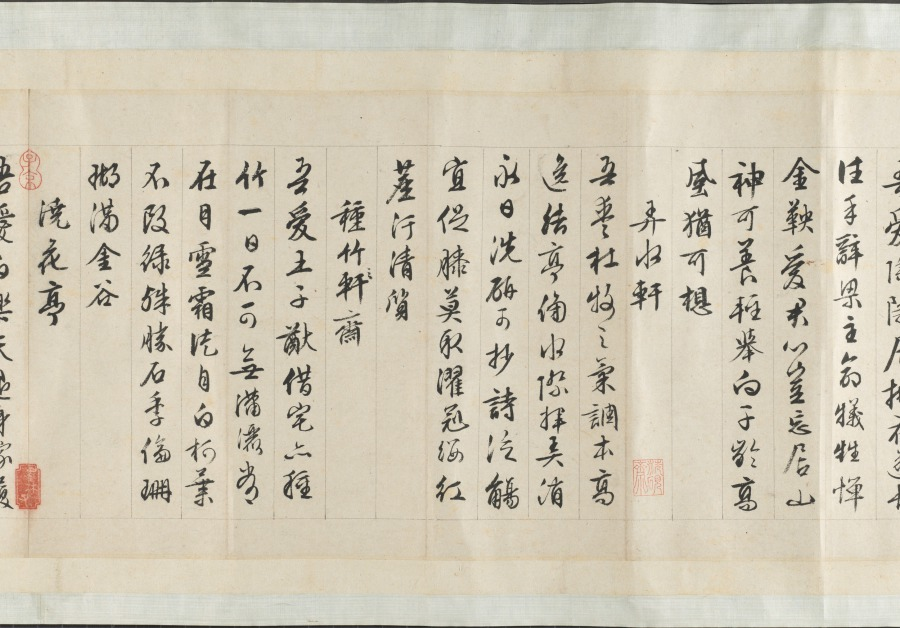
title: Garden for Solitary Enjoyment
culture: China, Ming dynasty (1368–1644)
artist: Qiu Ying (Chinese, 1494–1552)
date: 1515–52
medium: Handscroll; ink and light color on silk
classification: Painting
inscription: Accompanying text of an essay together with seven poems of Sima Guang (1019–1086) and one poem of Su Shi (1037–1101) written by Wen Zhengming (1470–1559) in 1558.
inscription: 2 colophons and 82 seals: 4 seals of Wen Zhengming 文徵明 (1470–1559); 59 seals of Xiang Yuanbian 項元汴 (1525–1590); 1 colophon, dated 1644, and 7 seals of Xiang Yukui 項禹揆 (c. late 1500s–1659); 1 colophon, dated 1880, and 2 seals of Weng Tonghe 翁同龢 (1830–1904); 2 seals of Ch'eng Chen-i (19th c.); 1 seal of Han Ch'ung (19th c.); 4 seals of Wan-go H. C. Weng 翁萬戈 (1918–2020); 3 seals unidentified.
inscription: Colophon by Xiang Yukui 項禹揆 (c. late 1500s–1659): The painting of The Garden for Self-enjoyment on the right by Shih-chou, Mr. Qiu [Qiu Ying] is in the style of Li Lung-mien. Its mood is peaceful, as if meeting the ancient gentlemen face to face among the brushes and silk; it lifts one above the sordid bustle of life. Formerly, my late father handed me this scroll which had only the painting without the written essay. I considered asking a good calligrapher to write the essay to add to it but was afraid that the quality of the writing would not match the painting. Several years later, I saw at a friend's house this essay and poems (of Ssu-ma Kuang] written by Hengshan [Wen Zhengming], once owned by my grandfather; so I spared no expense to obtain it. I rejoiced at this and said: "The divine swords are finally united. How things are pre-destined!" Now my friend Chang Kung-chao's technique for mounting [painting and calligraphy] is excellent. Therefore by daring to take them out and join them together, I can preserve this beautiful story of singular reunion. Xiang Yukui recorded at Hai-yeh-t'ang [hall] two days before New Year's Eve in the jiasheng year of the Chongzhen era [1644]. trans. LYSL/HK/WKH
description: Garden of Solitary Enjoyment refers to a site built in 1073 by the statesman Sima Guang (1019–1086) after he had retired to Luoyang, Henan province. Every spring, visitors would flock to his garden. Each of its seven structures references a historic figure. Sima wrote: I channel streams [like Du Mu], to water flowers [like Bai Juyi], or trim bamboo [like Wang Huizhi]. . . . I know of no joy between heaven and earth that could take its place. Qiu Ying’s painting, created after an 11th-century version of the same theme, must have appealed to garden owners of the Ming dynasty, since it became the template for numerous Suzhou workshop copies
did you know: Sima Guang completed his monumental survey of Chinese history, Zizhi tongjian, in the garden depicted in this painting.